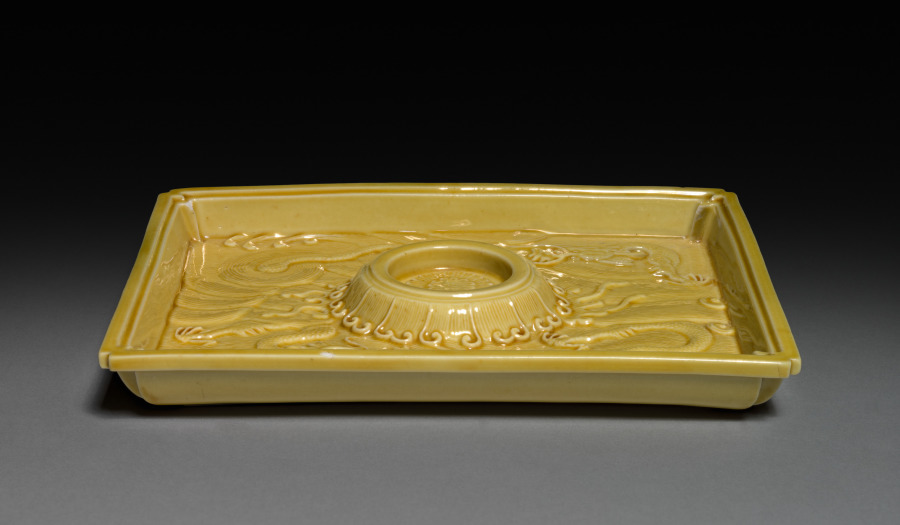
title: Cup Stand with Dragons in Waves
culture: China, Jiangxi province, Jingdezhen kilns, Qing dynasty (1644-1911), Kangxi reign (1662-1722)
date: 1662–1722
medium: porcelain with molded decoration and yellow glaze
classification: Ceramic